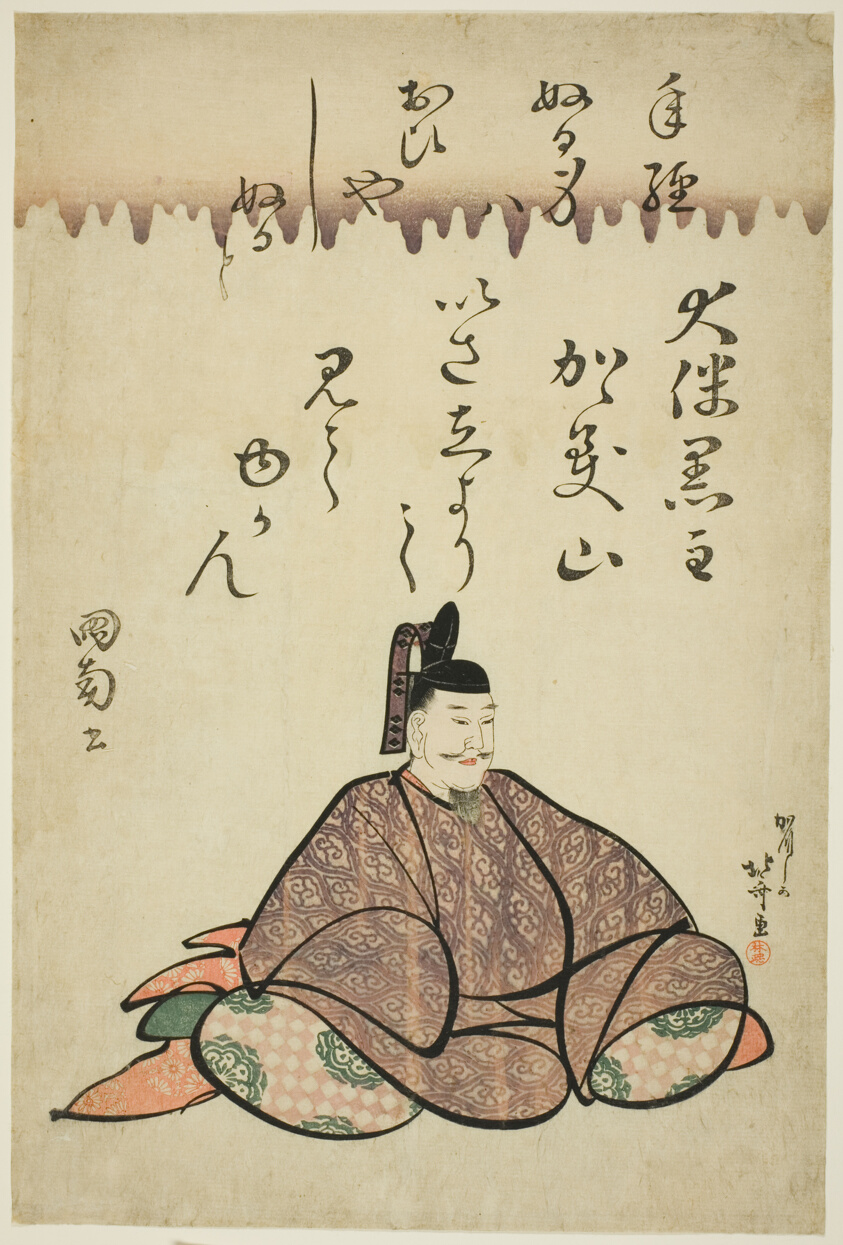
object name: Print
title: The Poet Otomo no Kuronushi, from the series Six Immortal Poets (Rokkasen)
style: Japanese (culture or style)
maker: Katsushika Hokusai 葛飾 北斎; Japanese, 1760-1849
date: c. 1810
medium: Color woodblock print; oban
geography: Japan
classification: woodblock print; print; asian art